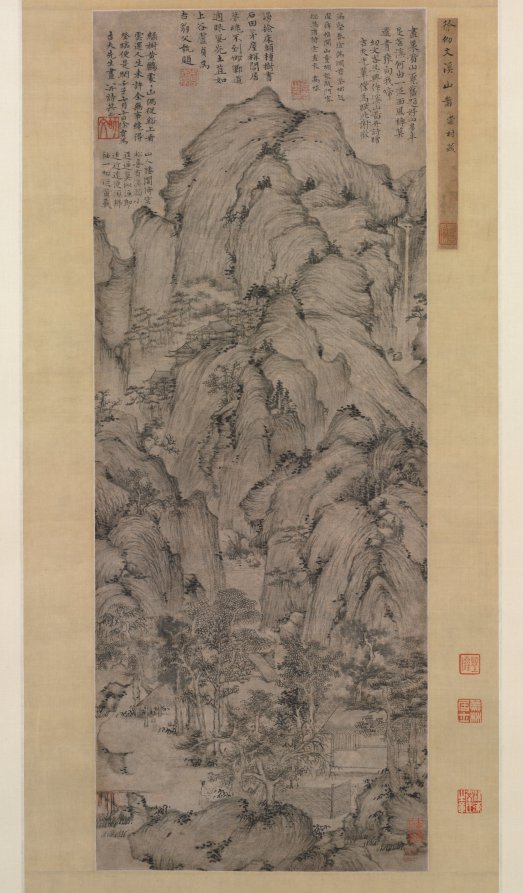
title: Streams and Mountains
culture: China, Yuan dynasty (1271-1368)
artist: Xu Ben (Chinese, 1335–1380)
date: 1372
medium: hanging scroll, ink on paper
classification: Painting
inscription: 綠樹黃鸝處處山， 偶從谿上看雲還。/ 人生未許全無事， 纔得登臨便是閑。 壬子七月十日徐賁為吉夫先生畫 並詩共上 [印] 幼文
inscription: Label on mounting probably by Liang Qingbiao 梁清標 (1620–1691).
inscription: 4 additional inscriptions and 9 additional seals: 1 poem of Xie Hui 謝徽 (c. 2nd half 14th c.); 1 poem and 1 seal of Gao Qi 高啟 (1336–1374); 1 poem and 1 seal of Lu Zhen 盧貞 (c. late 14th c.); 1 poem of Huang Zai 黃載; 3 seals of Liang Qingbiao 梁清標 (1620–1691); 1 seal of Wang Jiqian [C. C. Wang] 王季遷 (1907–2003); 3 seals unidentified.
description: Like many literati of the late Yuan and early Ming dynasties, Xu Ben was entangled with the perils of dynastic change as well as the ups and downs of his official career. It was mainly through the art of painting and poetry, as well as the ideal of reclusion, that he sought feelings of exhilaration and shared them with his friends. Xu created this monumental landscape during one of his periods of reclusion. His innumerable “hemp-fiber” texture strokes create a unifying rhythm among the towering mountains with tightly knit masses of rocks. Nestled among shady trees at the base of the mountain is a rustic retreat, which a scholar approaches on foot to visit with the hermit. Among the five inscriptions at the top of the painting is one by the artist himself. He dedicated the painting to someone named Jifu 吉夫 and recorded a poem in praise of mountains. Green trees, yellow orioles, everywhere are mountains; Aimlessly I return from the stream, where I watched the clouds. Man's life does not allow unbroken ease, But to be able to be high up in the mountain, this is leisure.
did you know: An attendant opens a reed gate to welcome the scholar with a walking stick approaching the rustic retreat.